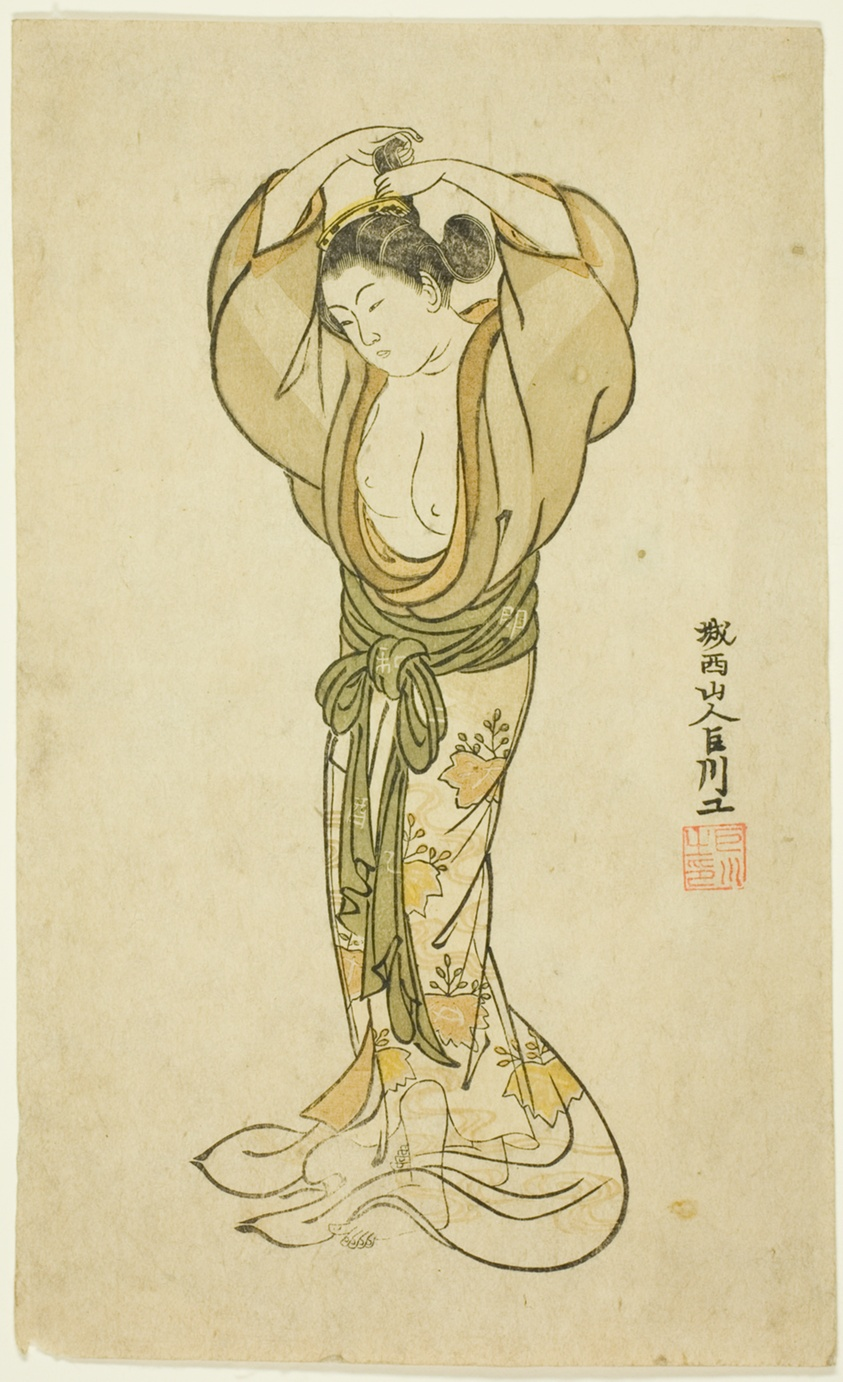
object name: Print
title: Woman Arranging Her Hair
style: Japanese (culture or style)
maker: Kyosen (Japanese, 1722–1777)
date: 1765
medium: Color woodblock print; hosoban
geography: Japan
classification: woodblock print; print; asian art